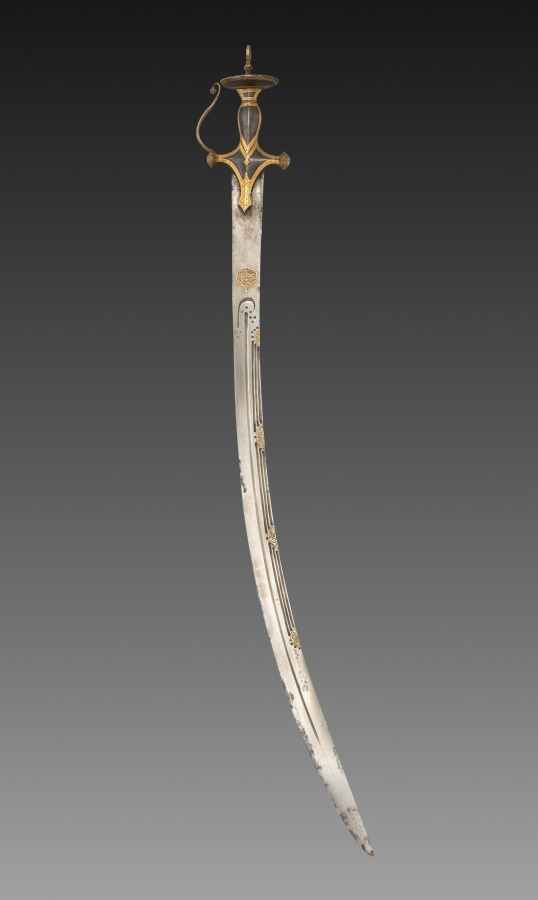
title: Silapa Sword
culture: India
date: 1700s–1800s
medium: gold with inlay and leather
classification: Arms and Armor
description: The exceptionally thin, curved blade is made of watered steel. The grooves, called fullers, allowed for weight reduction and prevented flexion. The costly hilt is fully overlaid with brass in steel, both inside and outside the knuckle.